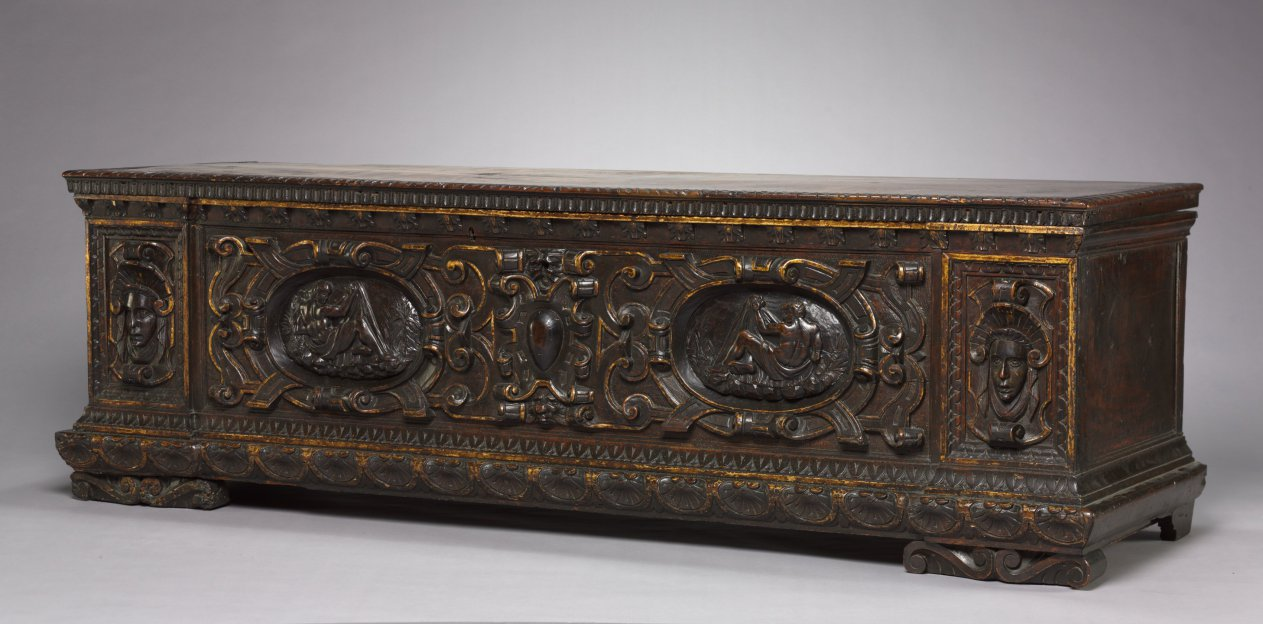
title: Cassone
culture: Italy, Venice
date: mid-1500s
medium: walnut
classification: Furniture and woodwork